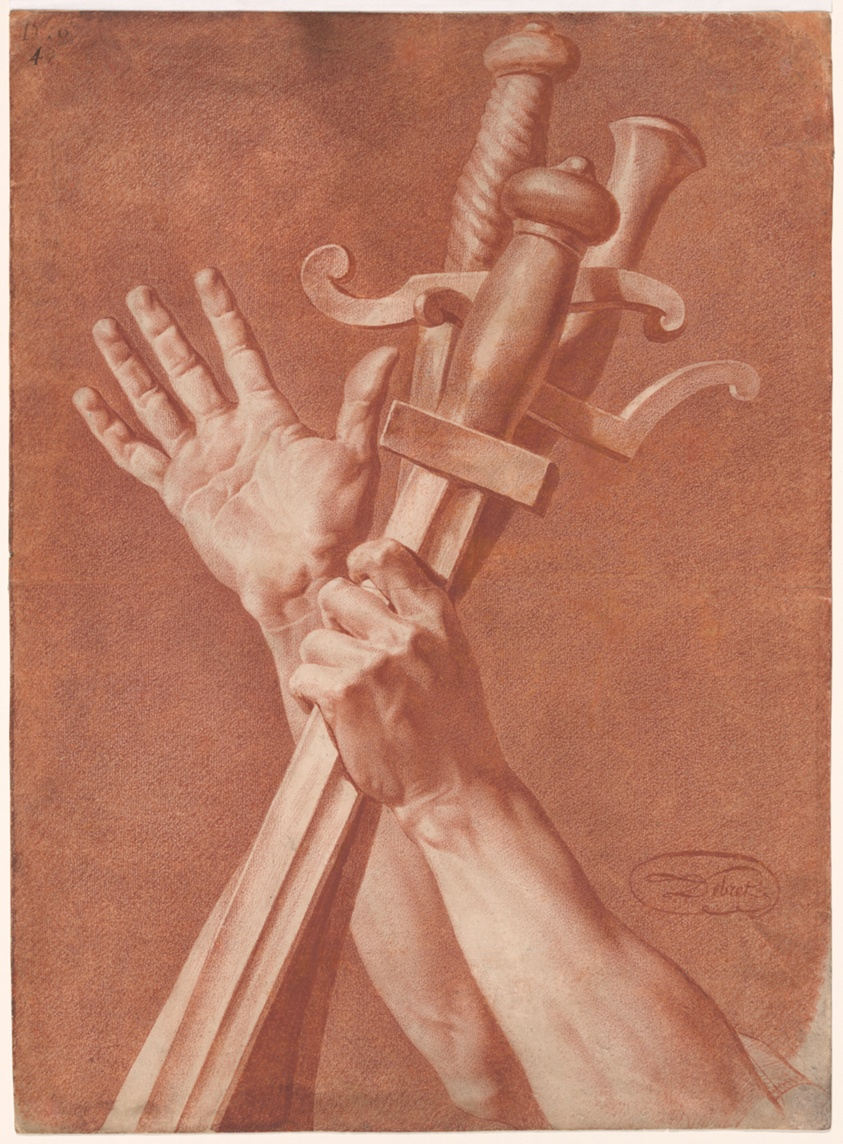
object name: Drawing and Watercolor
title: Hands of Horatius from The Oath of the Horatii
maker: Jean Baptiste Debret (French, 1768–1848); after Jacques-Louis David (French, 1748–1825)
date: 1785/90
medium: Red chalk on cream laid paper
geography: France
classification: prints and drawing; drawing; paper; chalk